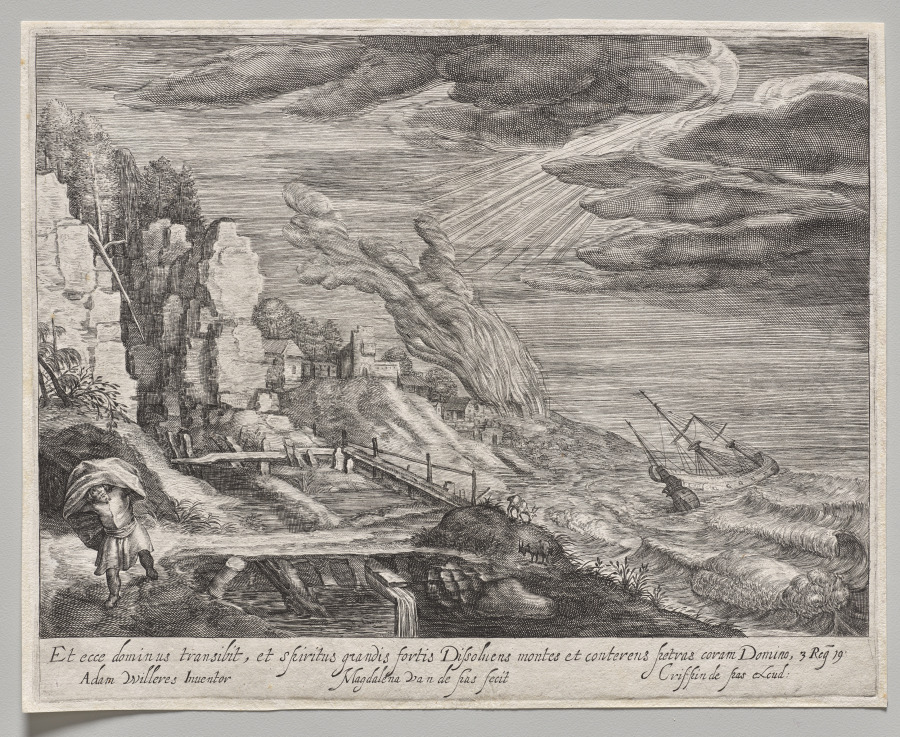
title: Seashore with a High Sea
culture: Netherlands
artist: Magdalena van de Passe (Dutch, 1595–1638)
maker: after Adam Willaerts (Dutch, 1577–1664)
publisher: Crispijn de Passe the Elder (Dutch, 1564–1637)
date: 1620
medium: engraving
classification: Print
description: Magdalena van de Passe is among a small number of female printmakers in the early modern period to have made a name for herself during her life. She likely knew the painter Adam Willaerts, who lived in the same town of Utrecht, since she made this engraving after one of Willaert’s coastal scenes. Van de Passe enhanced the scene by adding a figure depicting the Old Testament prophet Elijah emerging from a cave to listen to God, with engraved quotations from 1 Kings 17-19 beneath. Her meticulous engraving style, characterized by diminutive and somewhat irregular marks, is suited to the weather-worn scene, with its rocky outcrops, dramatic waterspout, and rolling hills.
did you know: Though the landscape depicted in this print is imaginary, the ship on the sea is a whaling vessel typical of Netherlandish manufacture of the 17th century.